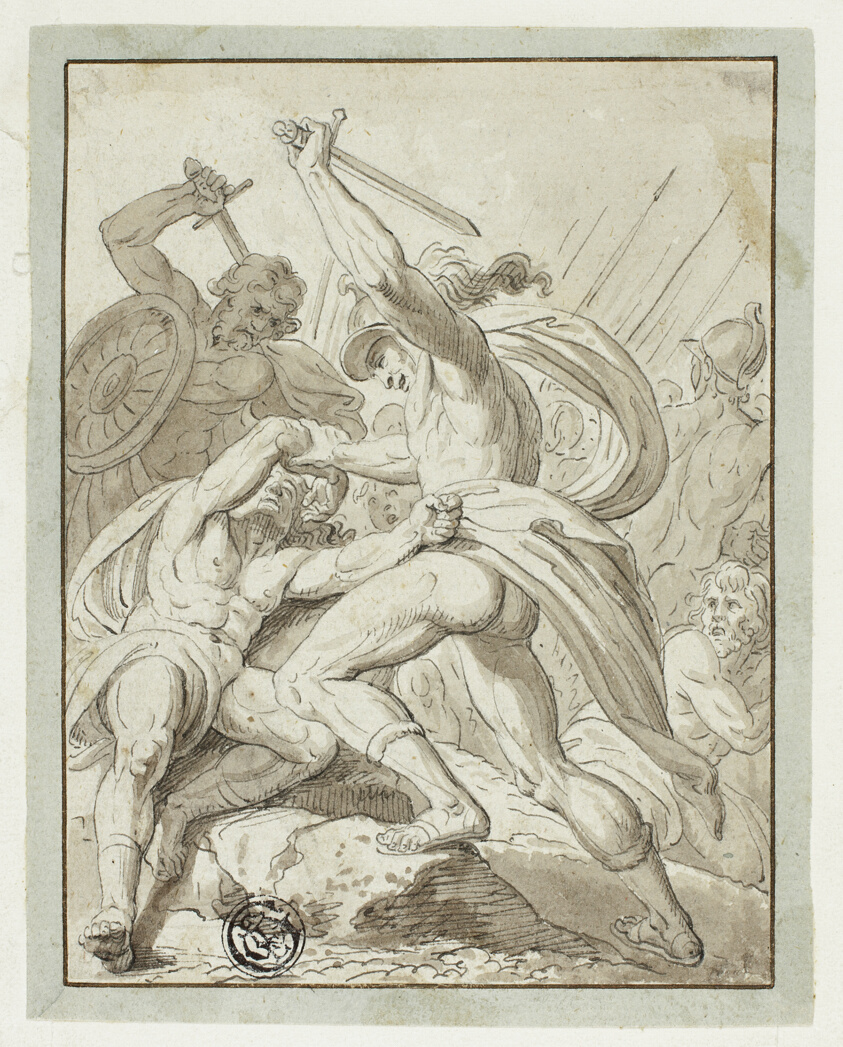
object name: Drawing and Watercolor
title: Classical Combat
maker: Felix Meyer (Swiss, 1653-1713)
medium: Pen and brown ink with brush and brown wash, over traces of graphite, on ivory laid paper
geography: Switzerland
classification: pen and ink drawings; drawings (visual works); prints and drawing